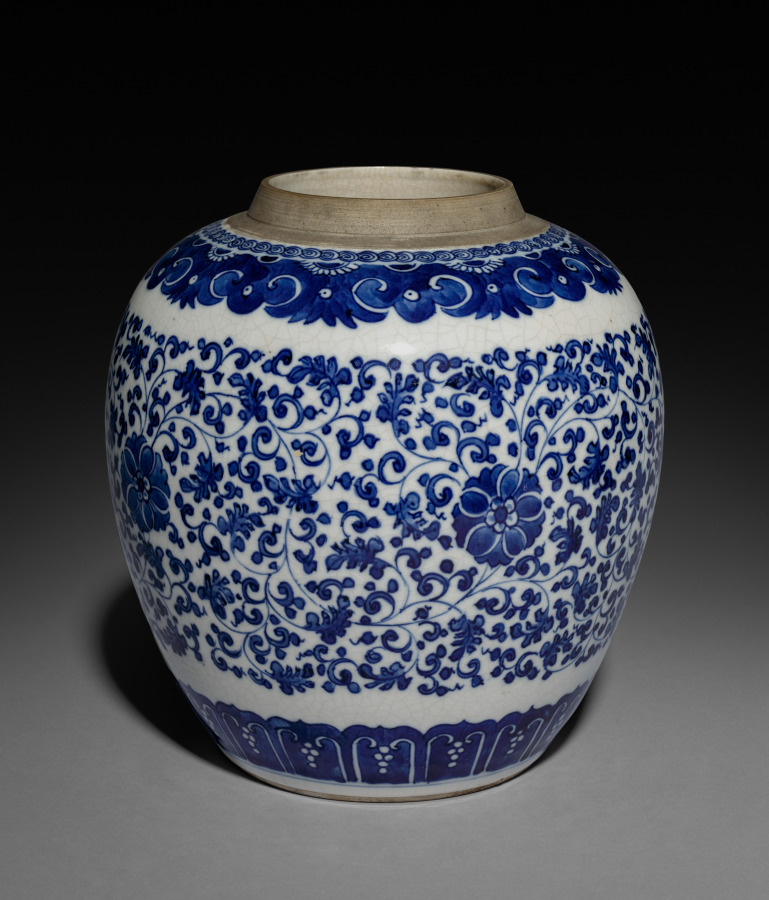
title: Ginger Jar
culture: China, Qing dynasty (1644–1911), Qianlong reign (1736–95)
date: 1736–95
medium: porcelain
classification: Ceramic